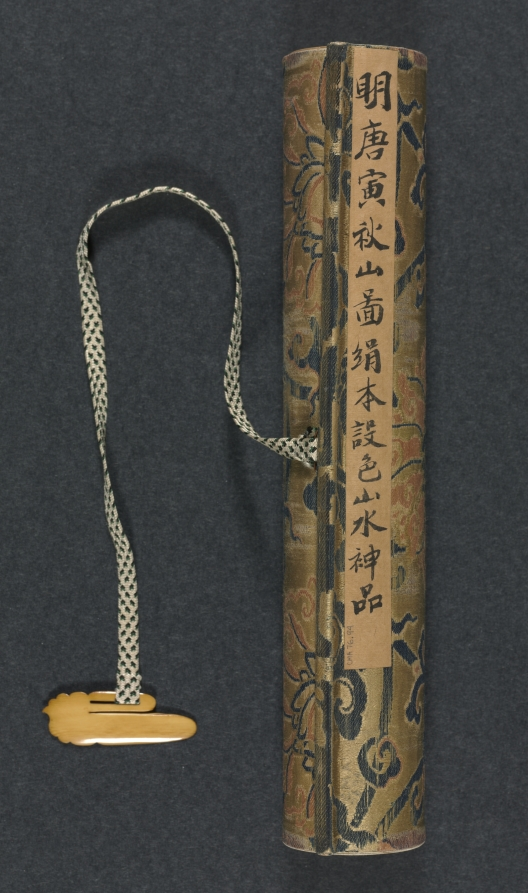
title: Scholar-Hermits in the Autumn Mountains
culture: China, Ming dynasty (1368–1644)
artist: Tang Yin (Chinese, 1470–1523)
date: 1500–1510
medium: handscroll, ink and light color on silk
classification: Painting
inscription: Artist's signature and 2 seals at end of scroll: Tang Yin [seals] T'ang Po-hu; T'ang Tzu'wei t'u-shu.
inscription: Title on frontispiece by Li Cho-kung (dates unknown).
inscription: 1 colophon and 11 additional seals: 1 colophon dated 1915 of Wu Tso-hsi (19th-20th c.); 2 seals of Gao Qifeng 高奇峰 (1889–1933); 5 seals of C. C. Wang 王季遷 (1907–2003); 4 seals unidentified.